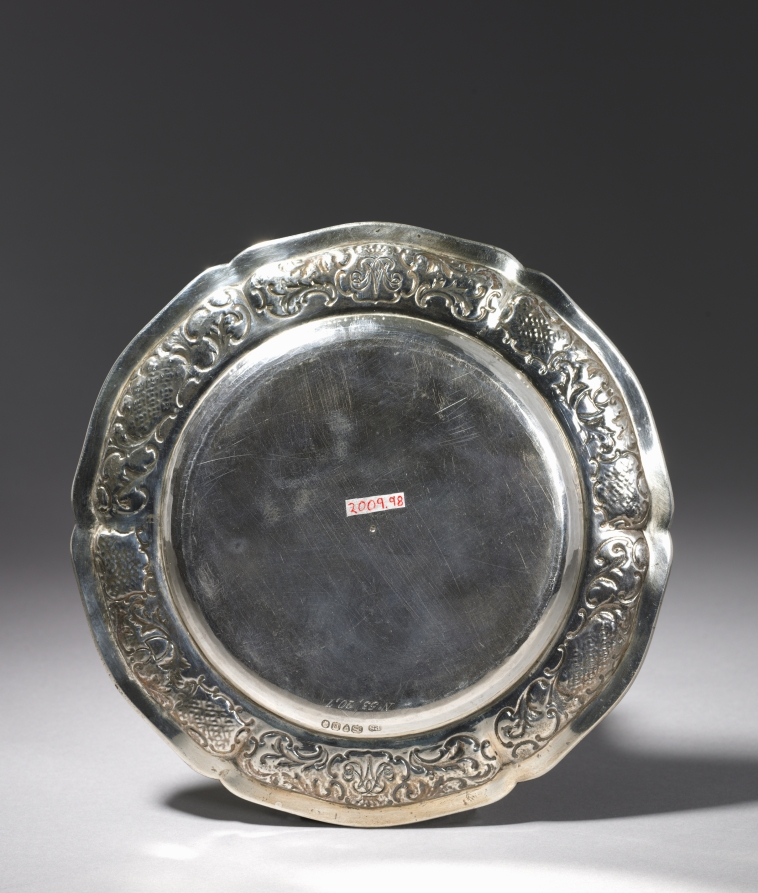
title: Plate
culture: England, 19th century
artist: Paul Storr (British, 1771–1844)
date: c. 1820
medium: silver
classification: Silver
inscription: Crest with a shield in the center and a falcon and deer on either sides of the shield, a crown and a possum. Banner reads 'UBIQUE, PATRIAM, REMINISCI'